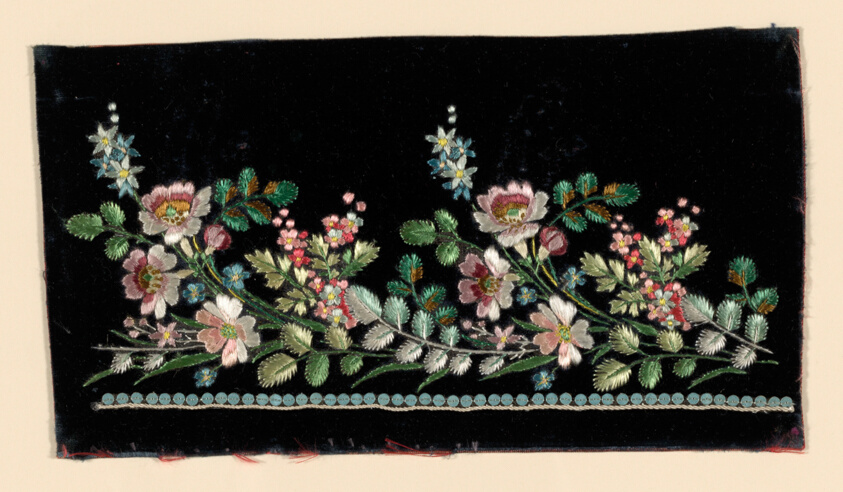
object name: Textile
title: Salesman's Sample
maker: France, possibly Lyon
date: 1780/90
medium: Silk, warp-float faced twill weave with supplementary pile warps forming cut, solid velvet; embroidered with silk floss in outline, satin and stem stitches; couching and French knots; silk, plain weave-covered paillettes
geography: France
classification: textile; needlework (visual works); costume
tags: flowers, pink (color), green (color), blue (color), foliage